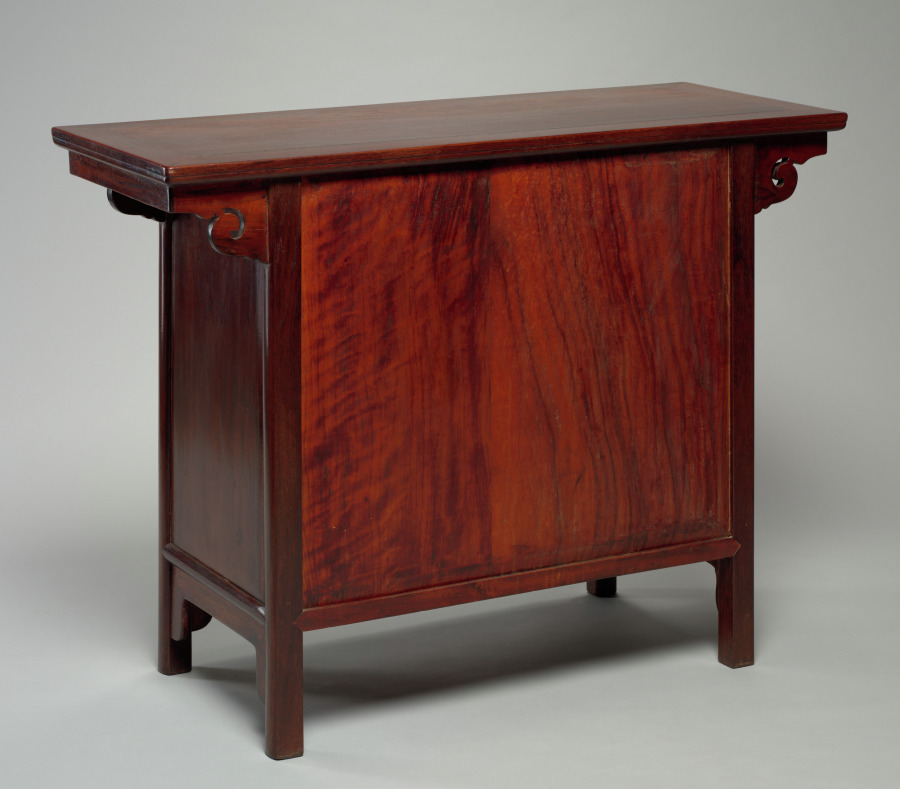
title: Table Top Cupboard: Gui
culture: China, Ming dynasty (1368–1644)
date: 1500s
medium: Rosewood (huanghuali)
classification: Furniture and woodwork